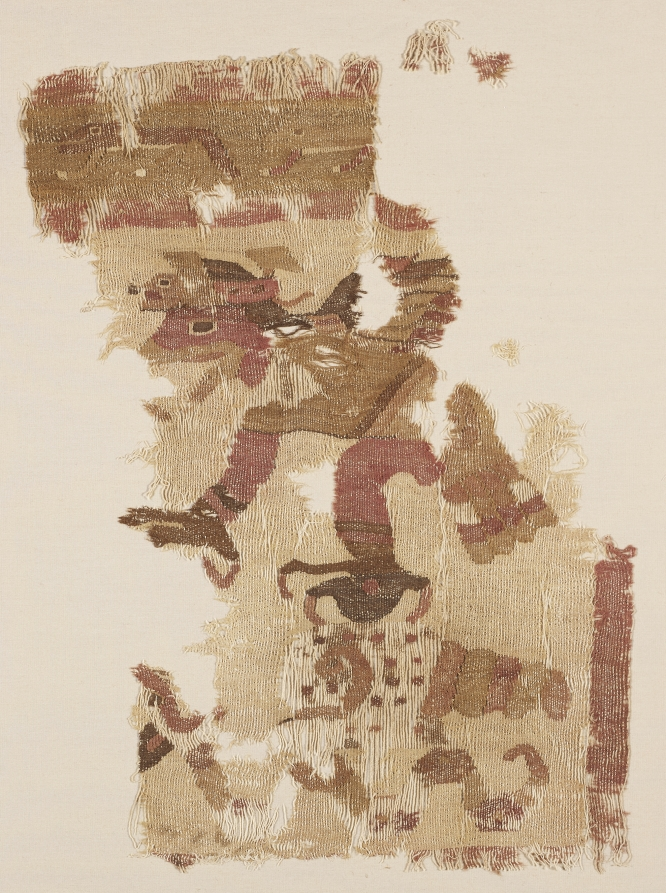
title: Textile Fragment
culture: Peru, Moche, north coast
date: c. 50–650 CE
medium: cotton and camelid fiber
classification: Textile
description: This fragment, one of several in the collection, is a rare survivor of catastrophic rains that destroyed much of the Moche textile legacy and may have helped to bring about the decline of Moche culture. It depicts a serpent and a snail beneath a hovering raptorial bird—perhaps a snail kite, a type of hawk named after its favored food. The size of the motifs implies that the original textile was large; a mantle (a shawl-like garment) or a hanging are among the possibilities.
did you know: This fragment is a rare survivor of floods that destroyed much of the Moche textile record.